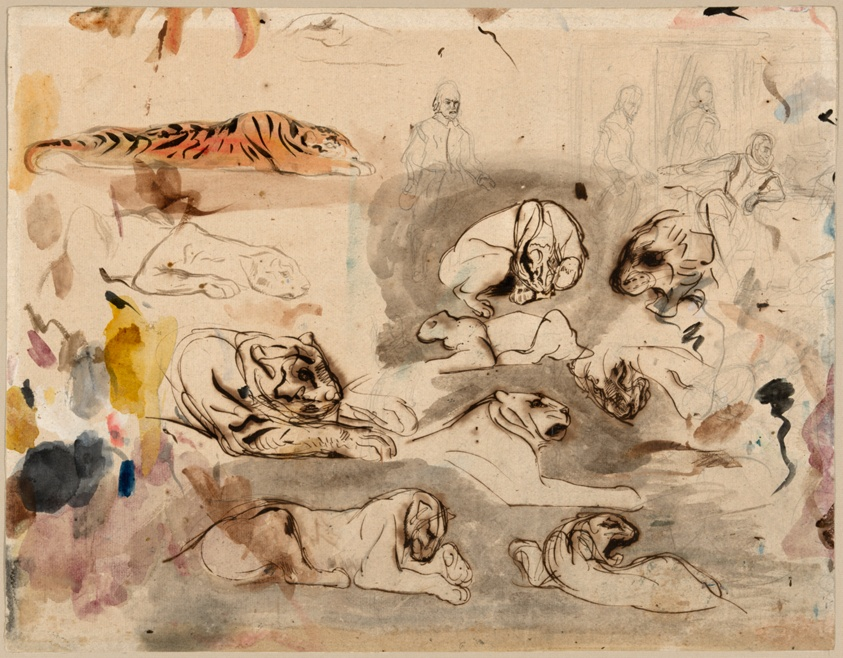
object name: Drawing and Watercolor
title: Sketches of Tigers and Men in 16th Century Costume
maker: Eugène Delacroix (French, 1798-1863)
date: 1828–29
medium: Watercolor, pen and iron gall ink, and graphite, on ivory laid paper with blue fibers (discolored to buff)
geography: France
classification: drawings (visual works); prints and drawing